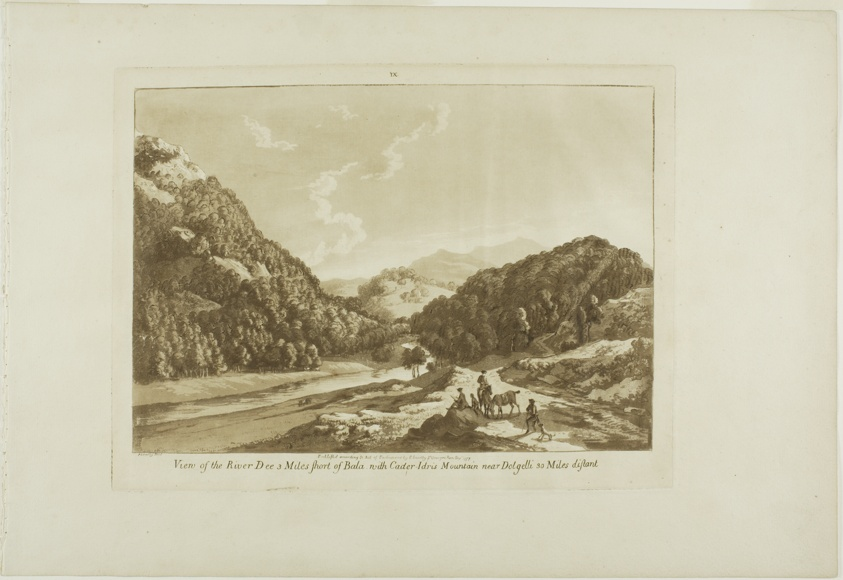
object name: Print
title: View of the River Dee 3 Miles Short of Bala, with Cadar-Idris Mountain near Dolgelli 30 Miles Distant, plate nine from Twelve Views in Wales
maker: Paul Sandby (English, 1731-1809)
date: 1777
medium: Aquatint on cream laid paper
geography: England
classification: aquatint; print; prints and drawing